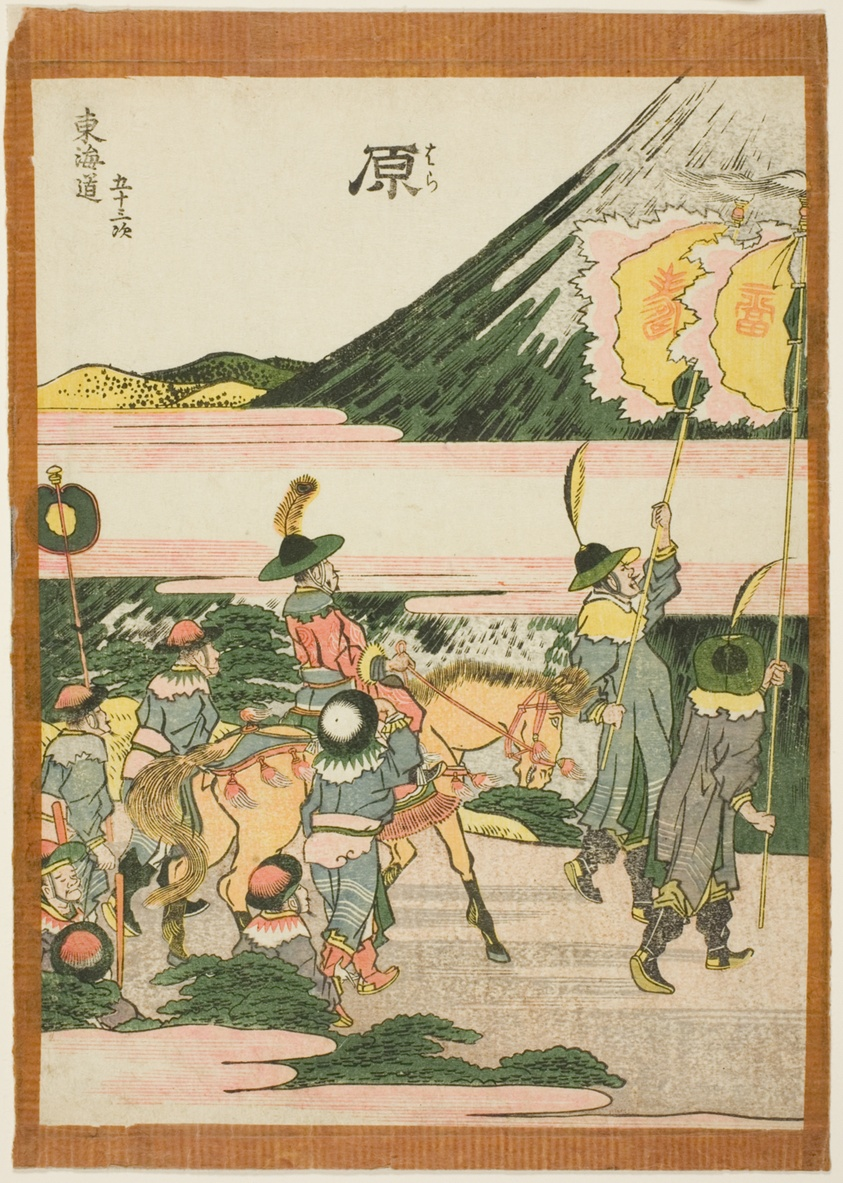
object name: Print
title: Hara, from the series ""Fifty-three Stations of the Tokaido (Tokaido gojusan tsugi)""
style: Japanese (culture or style)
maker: Katsushika Hokusai 葛飾 北斎; Japanese, 1760-1849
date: c. 1806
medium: Color woodblock print; chuban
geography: Japan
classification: woodblock print; print; asian art